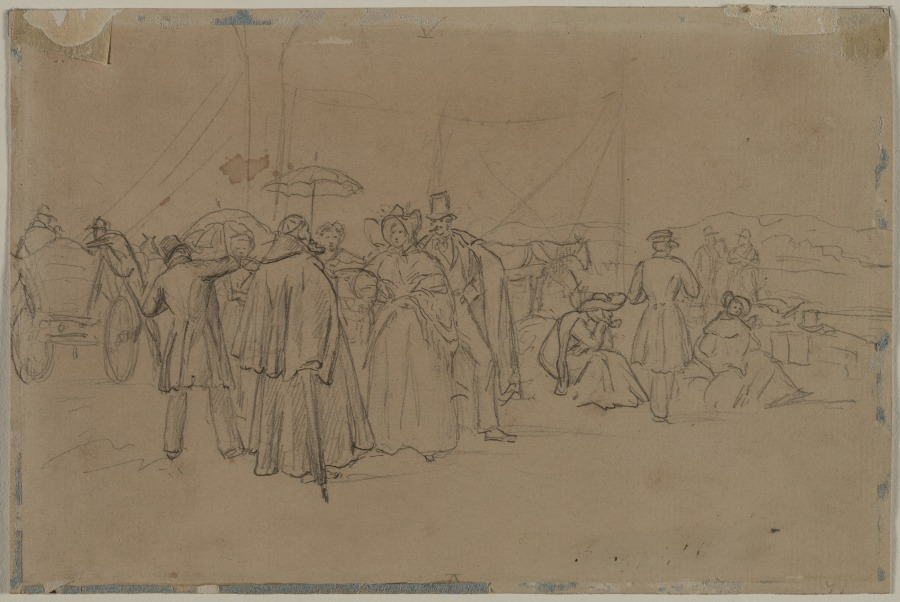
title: Passengers for Rhine Steamer (recto) Passengers for Rhine Steamer (verso)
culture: Germany, 19th century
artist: Heinrich von Mayr (German, 1806–1871)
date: second or third quarter 1800s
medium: graphite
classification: Drawing